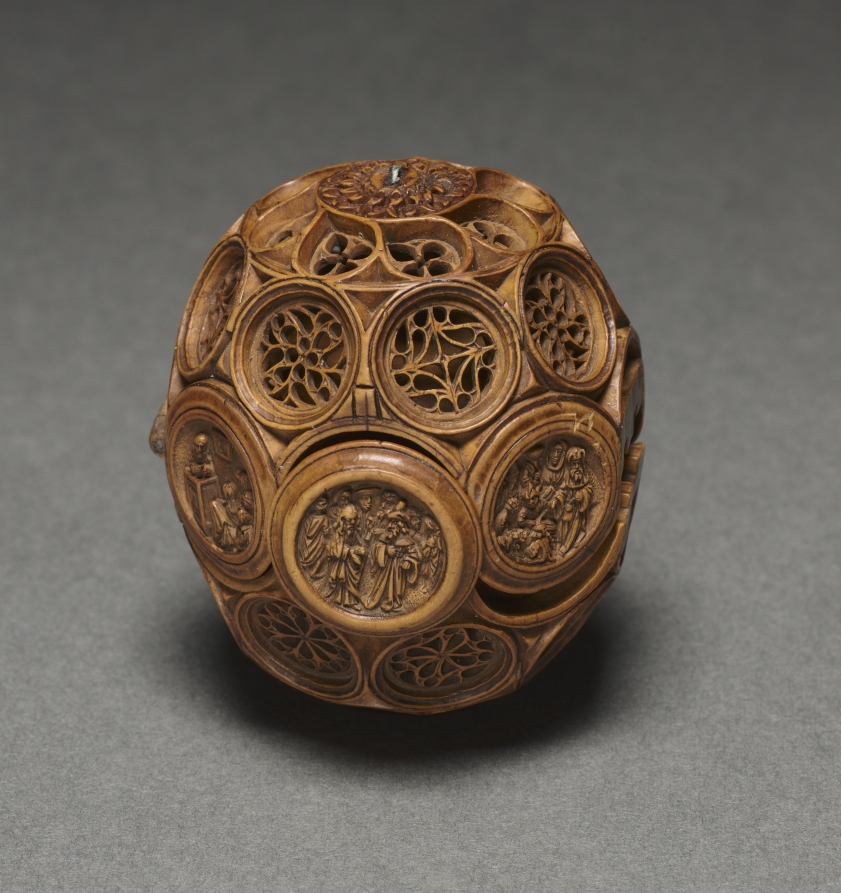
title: Prayer Nut with Scenes from the Life of St. James the Greater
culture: Northern Netherlands (Holland)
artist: Adam Dircksz (Netherlandish, active c. 1500)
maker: and Workshop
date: c. 1500–1530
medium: boxwood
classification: Sculpture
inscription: Interior around lower half: SANCTVS SACRILEGI STAT IVDICIS ANTE TRIBVNAL (Holiness stands before the throne of the profane judge)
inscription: Interior, around upper half: GAVDENS PRO CRISTO IACOBVS SVBDIT CAPVT ENSI (St James submits his head to the sword)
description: Prayer nuts are capsules that can be opened in half and were mainly worn from the end of the 1400s until 1530, particularly in the Netherlands. These objects are generally made from boxwood and carved with extreme refinement and delicacy. They often echo Gothic architecture and include openwork tracery or elaborate decorative patterns. Prayer nuts came into fashion for private devotion as a pendant on the rosary or on a decorative chain. The emergence of prayer nuts went hand in hand with the practice of praying the rosary more frequently at the end of the Middle Ages.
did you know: This miniature masterpiece was held and caressed within the palm of the holder as they prayed and meditated on their faith. What do you use to focus or engage in quiet concentration?